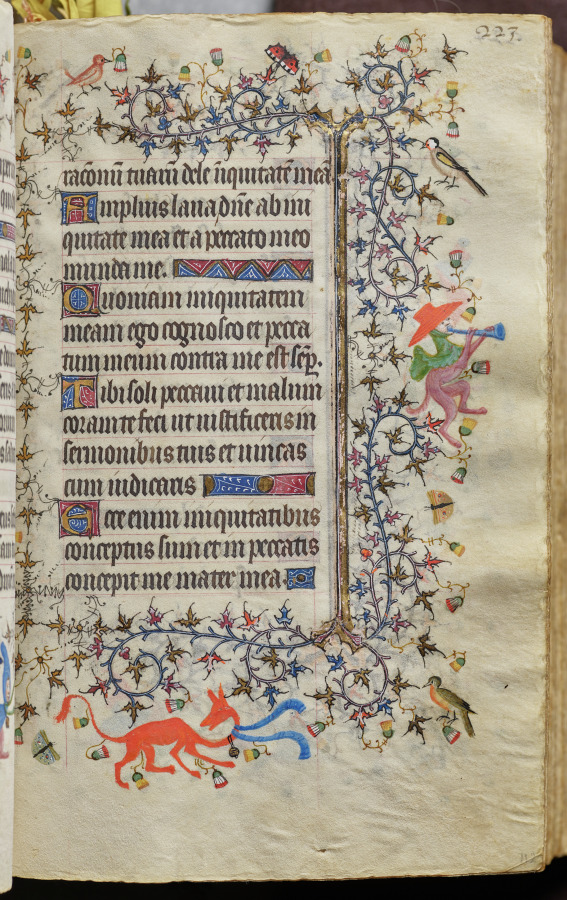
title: Hours of Charles the Noble, King of Navarre (1361-1425): fol. 112r, Text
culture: France, Paris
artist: Master of the Brussels Initials and Associates (French)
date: c. 1405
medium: ink, tempera, and gold on vellum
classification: Bound Volume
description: This precious volume was obviously highly prized by its owner, the French-born King of Navarre, who had his coat of arms painted on no less than twenty folios. Rather than directly commissioning this manuscript from a specific workshop, it seems that Charles the Noble acquired his book of hours -- perhaps ready-made for the luxury market -- while on a trip to Paris in 1404-05. A collaborative effort, six painting styles are evidenced within the pages of this codex, those of two Italians, two Frenchmen, and two Netherlanders. The painter who was responsible for the planning and decoration of the book, and who produced seventeen of the large miniatures, was a Bolognese artist known as the Master of the Brussels Initials. His principal assistant, responsible for most of the borders, was a Florentine who signed his name "Zecho" da Firenze on folio 208 verso.